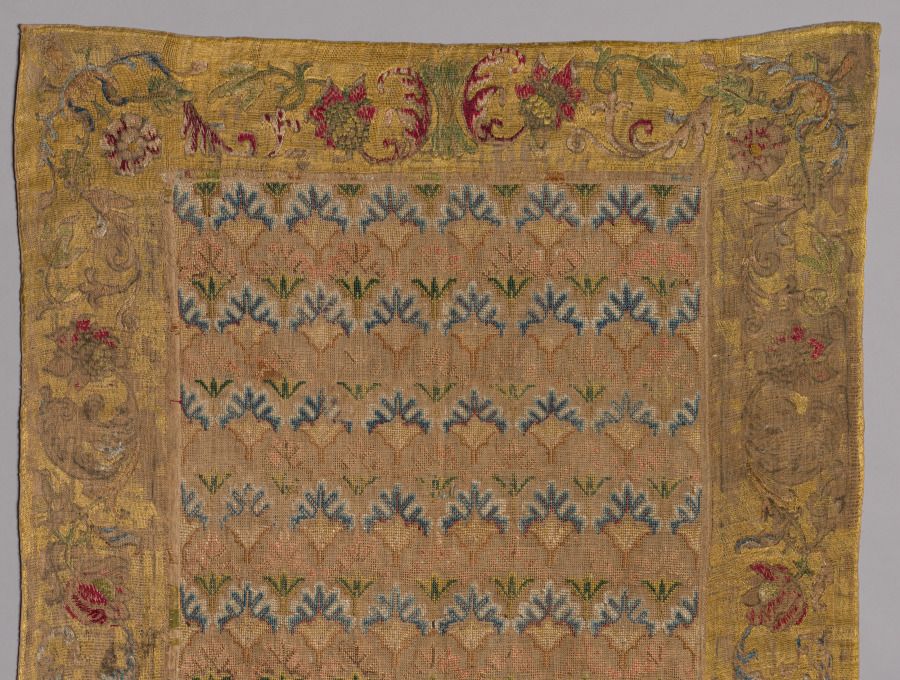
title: Embroidered Panel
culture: Italy, 17th century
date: 1600s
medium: embroidery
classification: Embroidery